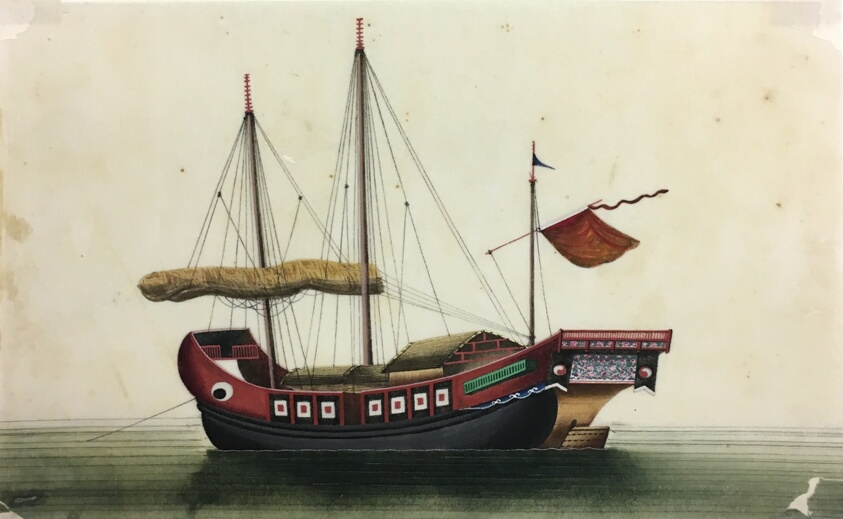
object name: Painting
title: Ship paintings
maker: China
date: mid 19th century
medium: Album of ten leaves; watercolor on paper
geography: Guangdong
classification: painting; asian art